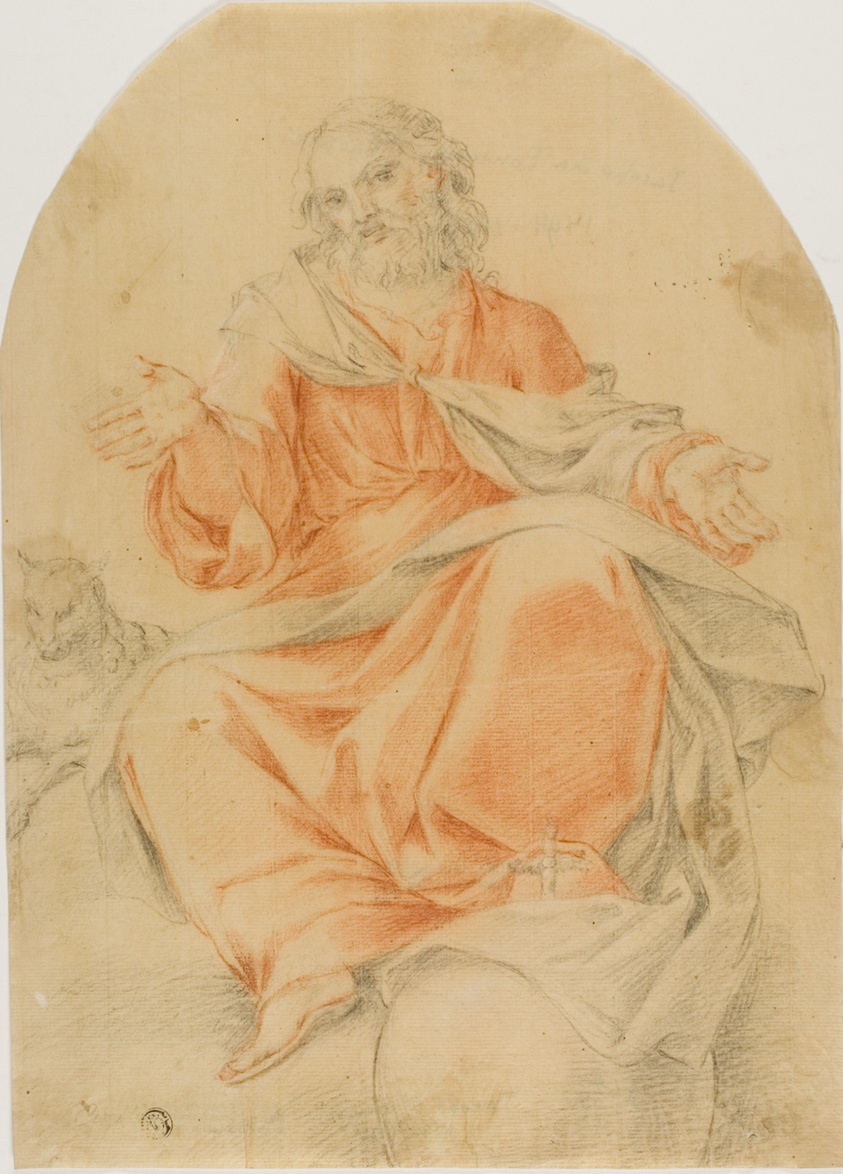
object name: Drawing and Watercolor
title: Christ as Salvator Mundi with Lamb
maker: Jacopo Carucci, called Jacopo da Pontormo; Italian, 1494-1557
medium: Red chalk and black chalk on cream laid paper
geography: Italy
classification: chalk; drawings (visual works); prints and drawing